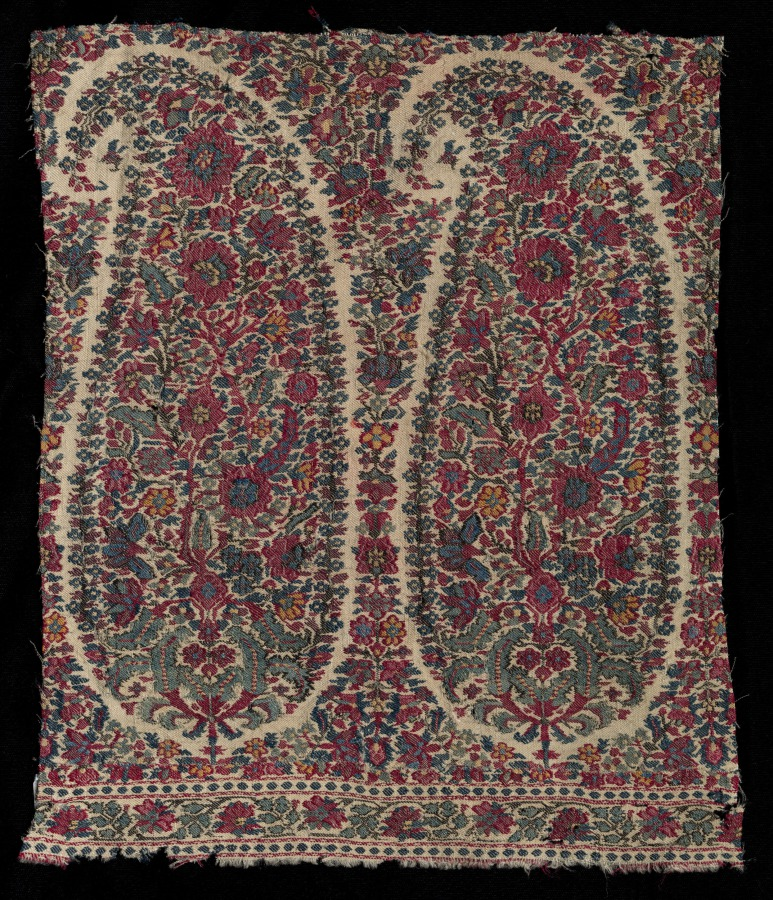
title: Long Shawl Fragment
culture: India, Kashmir, 19th century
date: 1820–1825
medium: 2/2 twill tapestry weave, double interlocked; wool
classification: Textile